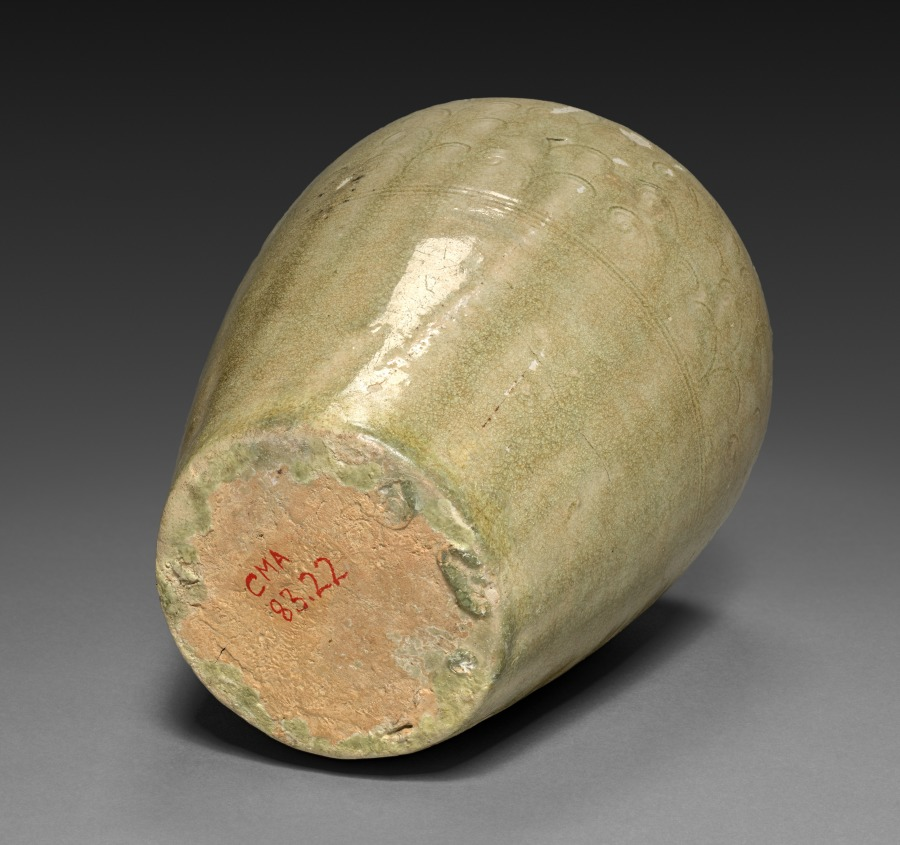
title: Wine Flask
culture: Japan, Kamakura period (1185–1333)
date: c. 1300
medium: Stoneware with ash glaze and underglaze stamped and incised decoration (Seto ware)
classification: Ceramic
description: This wine flask (heishi) was produced in Seto, in present-day Aichi prefecture near the city of Nagoya. Seto ware was made in imitation of Chinese Song dynasty prototypes, and was unique among Japanese ceramics for being glazed at the initial time of its production in the late 1200s. Such wares were later prized for display in tea practice.